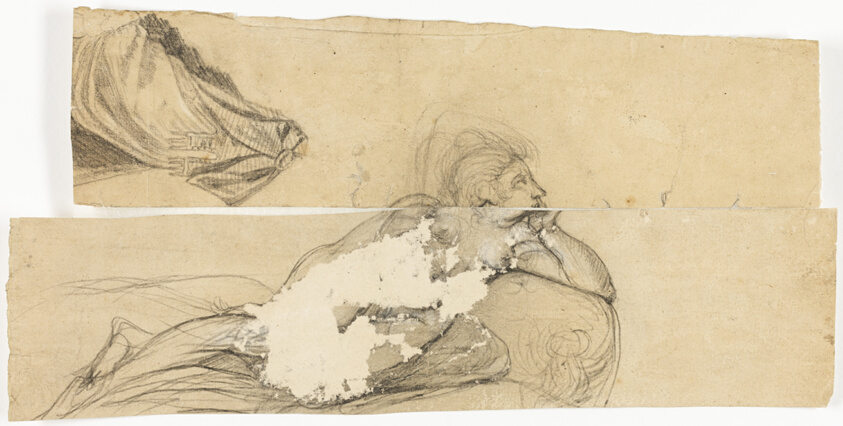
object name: Drawing and Watercolor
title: Studies of Nudes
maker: Henry Fuseli (Swiss, active in England, 1741-1825)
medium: Black crayon or charcoal heightened with white, on a fragment of tan laid paper, laid down on white Japanese tissue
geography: England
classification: crayon; prints and drawing; paper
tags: zigzags